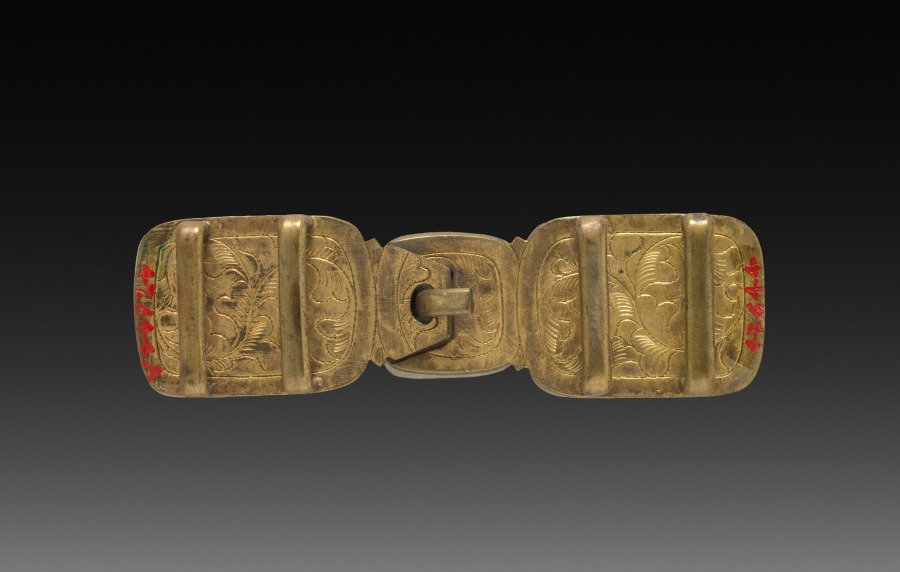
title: Buckle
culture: China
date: 1900s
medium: brass with veneer of white jade set with agate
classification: Jewelry